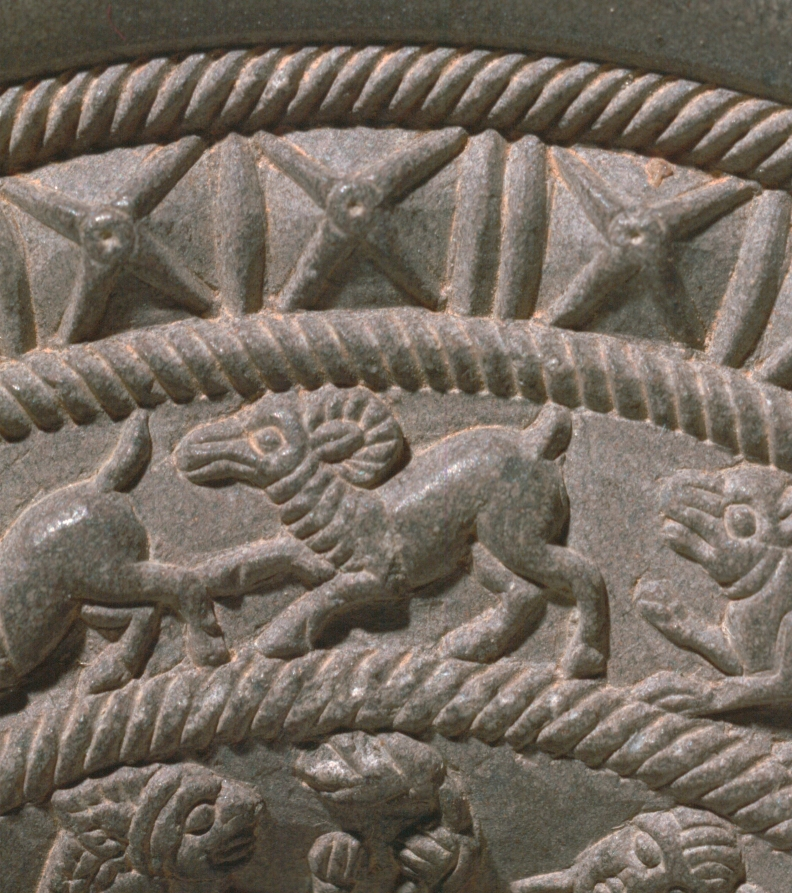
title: Ringstone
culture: India, Maurya period (322–185 BCE)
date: 200s BCE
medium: steatite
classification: Sculpture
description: Ringstones are among the earliest works of art to be created in stone during India's historical period. This example is finely carved with detailed images of affectionate couples and palm trees, running animals, and geometric motifs in concentric circles. The function of ringstones remains uncertain, since none of the surviving examples is inscribed or explained in a text.